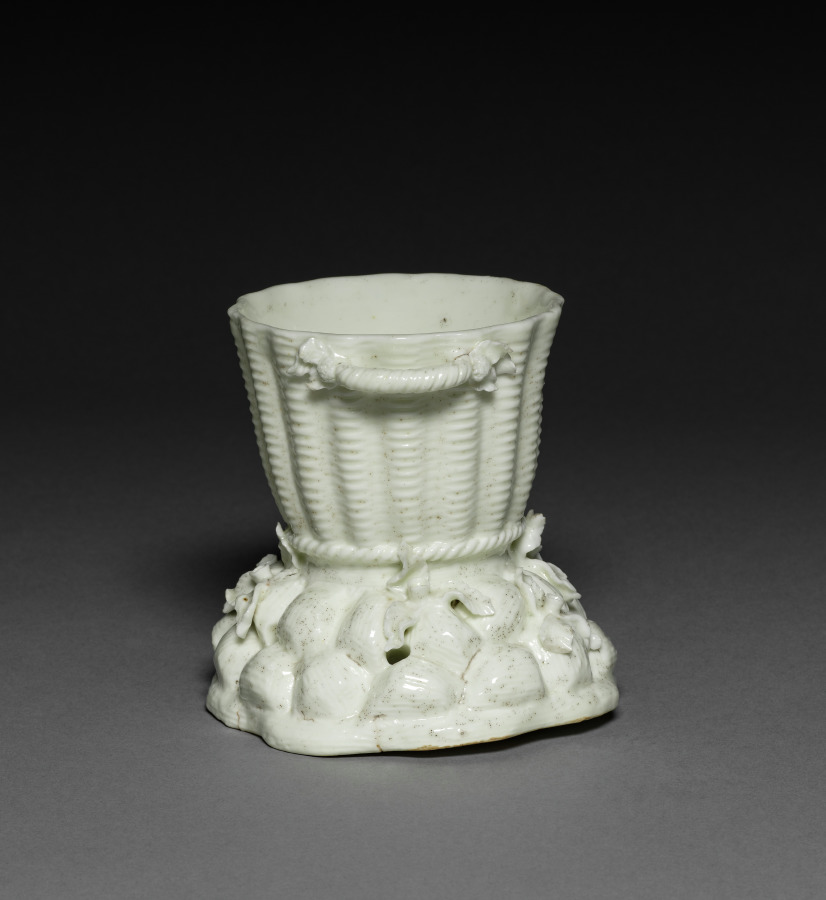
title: Potpourri Vase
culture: France, Saint Cloud, 18th century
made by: Saint Cloud Porcelain Factory (French)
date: mid 1700s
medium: soft-paste porcelain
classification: Ceramic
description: A vase like this was created to contain potpourri, a mixture of flowers, herbs, and spices emitting ambient fragrance. This specific function offered a particularly fertile ground for the development of French porcelain, as manufactories experimented with forms, surface ornamentations, and placement of perforations.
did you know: Prior to Saint-Cloud's development of soft-paste porcelain in the 1690s, rumors spread throughout Europe that the prized material was made by burying a variety of materials, including lobster shells, in the ground for 80 years.